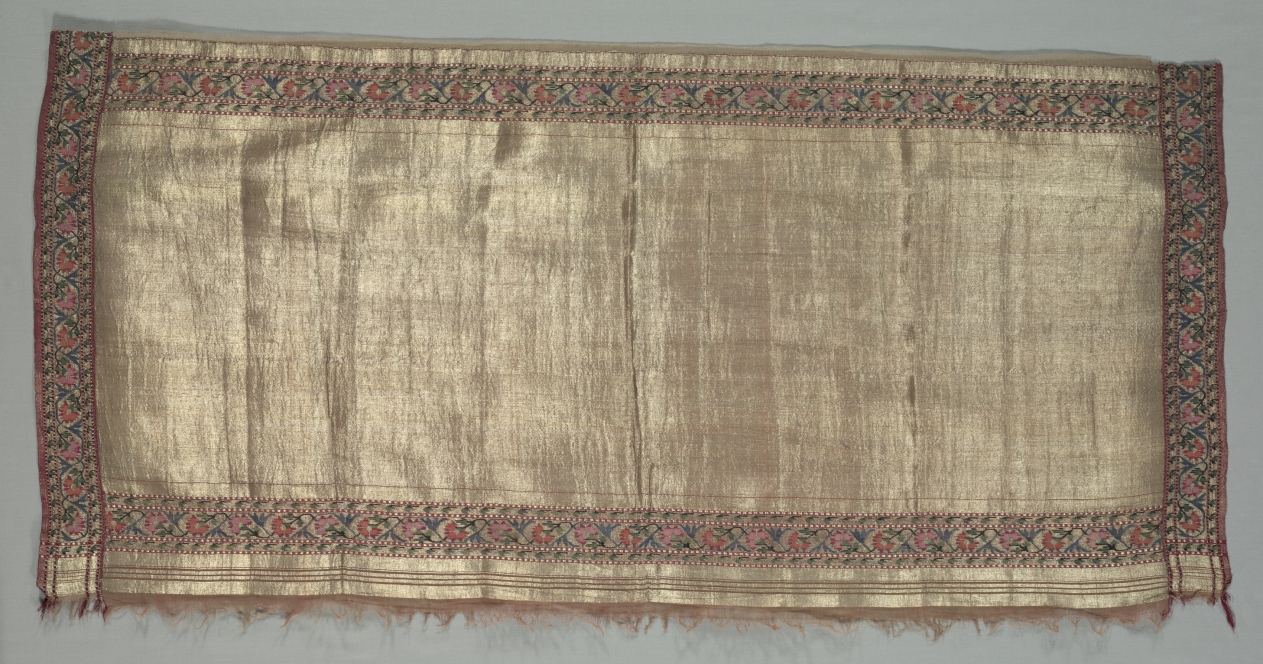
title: Part of a sari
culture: India, Mughal, Aurangabad, 18th-19th century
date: 1700s–1800s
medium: central panel plain weave (paired weft): silk and metal thread; tapestry weave border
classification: Textile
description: This section of an upper garment has been cut down from its original length, with borders applied to the short ends. The rose-colored threads in one direction lend an underlying warmth to the metallic thread woven in the opposite direction that changes hue and sheen as the wearer moves. The border is a flowering vine pattern with alternating pink and orange blossoms.